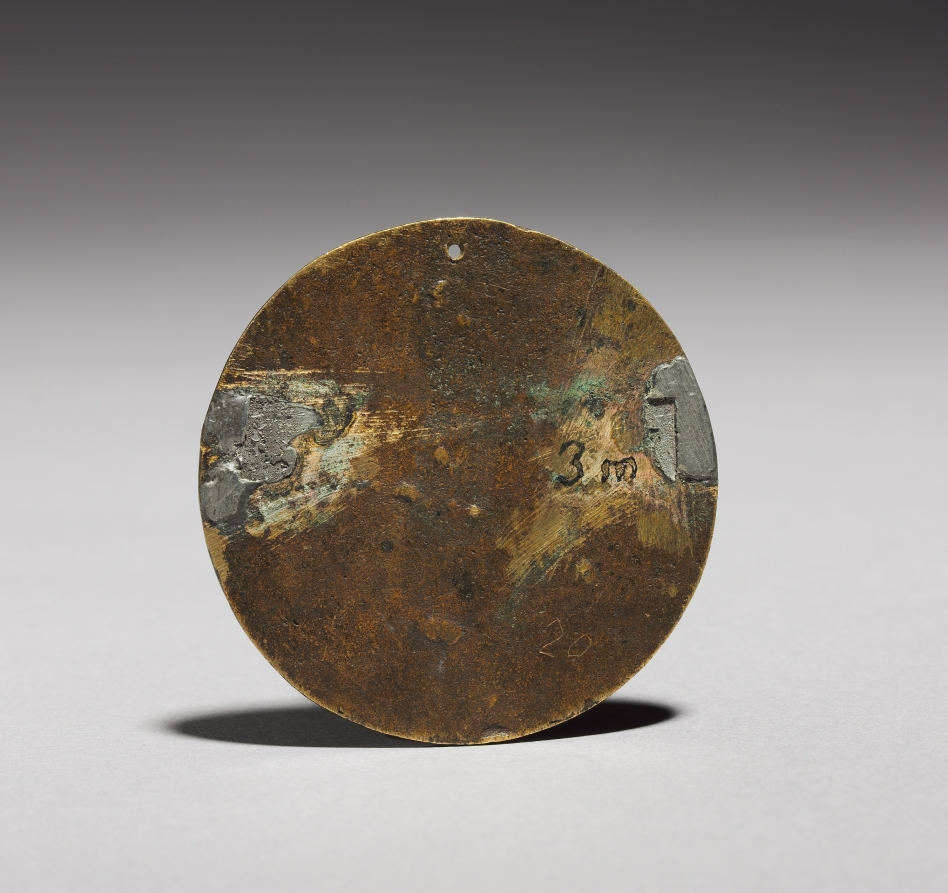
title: Dubia Fortuna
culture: Italy, 16th century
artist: Moderno (Italian, 1467–1528)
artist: and Workshop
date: c. 1505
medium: bronze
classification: Sculpture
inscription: Inscribed: DVBIA.FORTV-NA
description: The inscription DUBIA FORTUNA is generally translated as "doubtful fortune," and speaks to the vagaries of war.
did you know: Fortuna, mentioned on this plaquette's inscription, is the Roman goddess of luck.